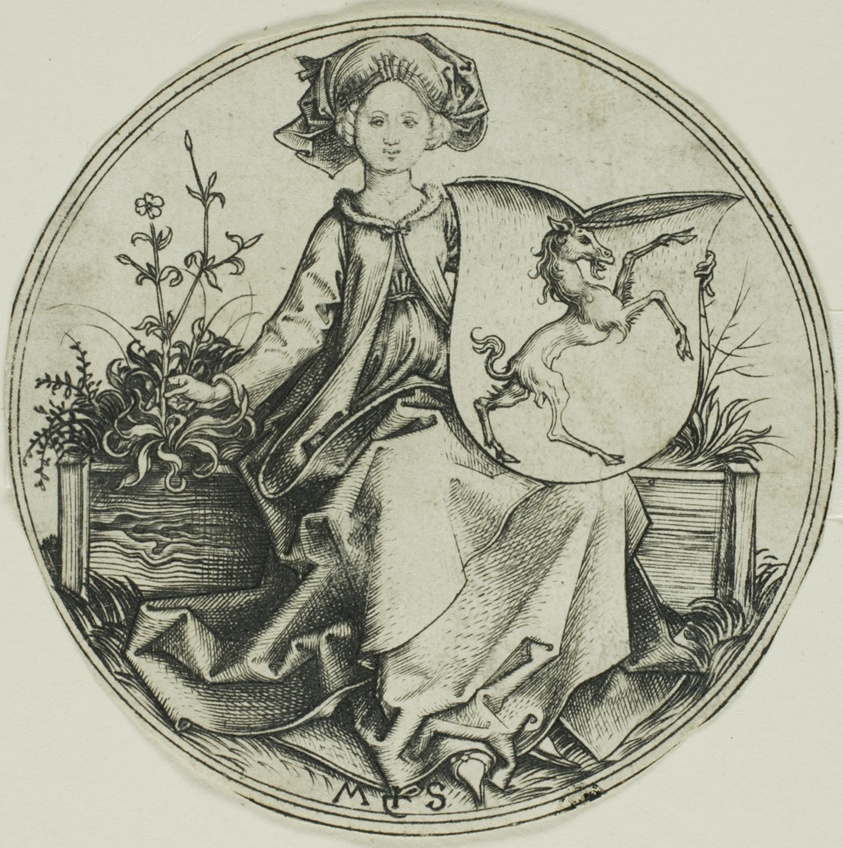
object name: Print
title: Shield with a Unicorn, Held by a Lady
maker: Martin Schongauer (German, c. 1430/50-1491)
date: 1480/90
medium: Engraving in black on ivory laid paper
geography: Germany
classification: engraving; print; prints and drawing